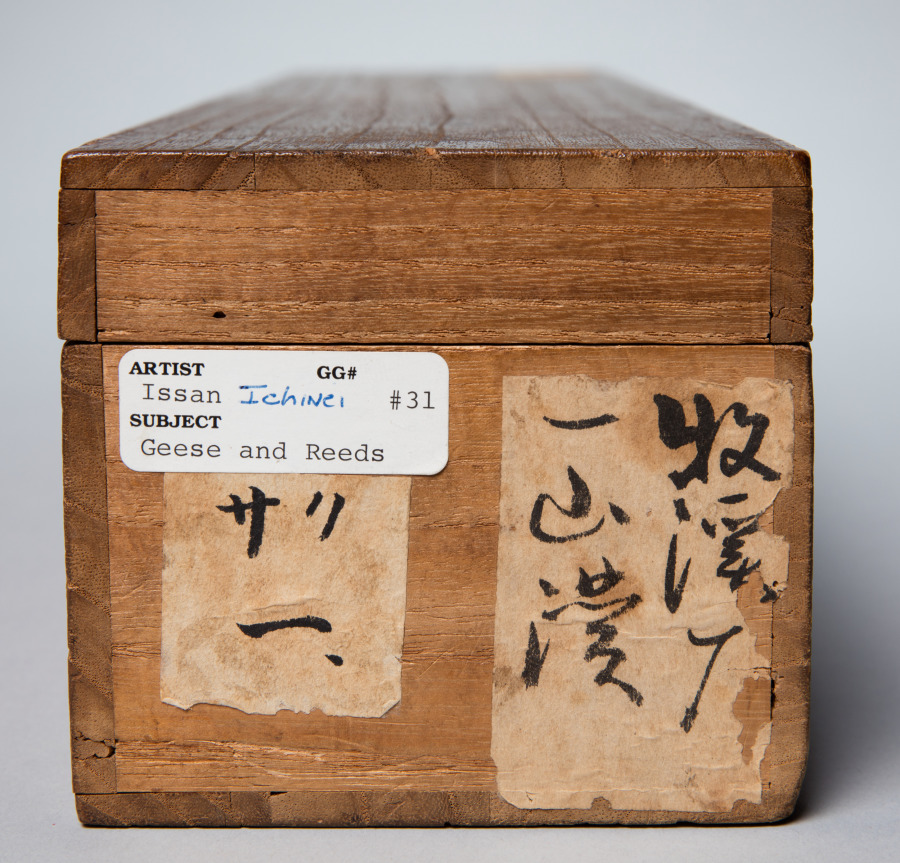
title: Reeds and Geese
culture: Japan, Kamakura period (1185–1333)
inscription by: Yishan Yining [Issan Ichinei] (Chinese, 1247–1317)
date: 1314–17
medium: hanging scroll; ink on paper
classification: Painting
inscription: signed: Issan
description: Reeds and geese has been a common pairing in Chinese literary and visual culture for many centuries. This painting presents the contribution of a Japanese amateur painter, almost certainly a Zen Buddhist monk, to Japan’s fledgling efforts to add the theme to its own cultural vocabulary in the early 1300s. As was customary at the time in Japan, the painter did not sign or seal his work; the inscription, a poem added to the painting by the eminent émigré monk Yishan Yining, along with his signature and seal, was of far greater cultural value. Today, the modestly sized painting has tremendous significance as one of the earliest surviving examples of Japanese ink paintings with reeds and geese.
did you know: Tokyo National Museum owns a copy of this painting made by Kano Gyokusen (1796–1864) when he was 14 years old.